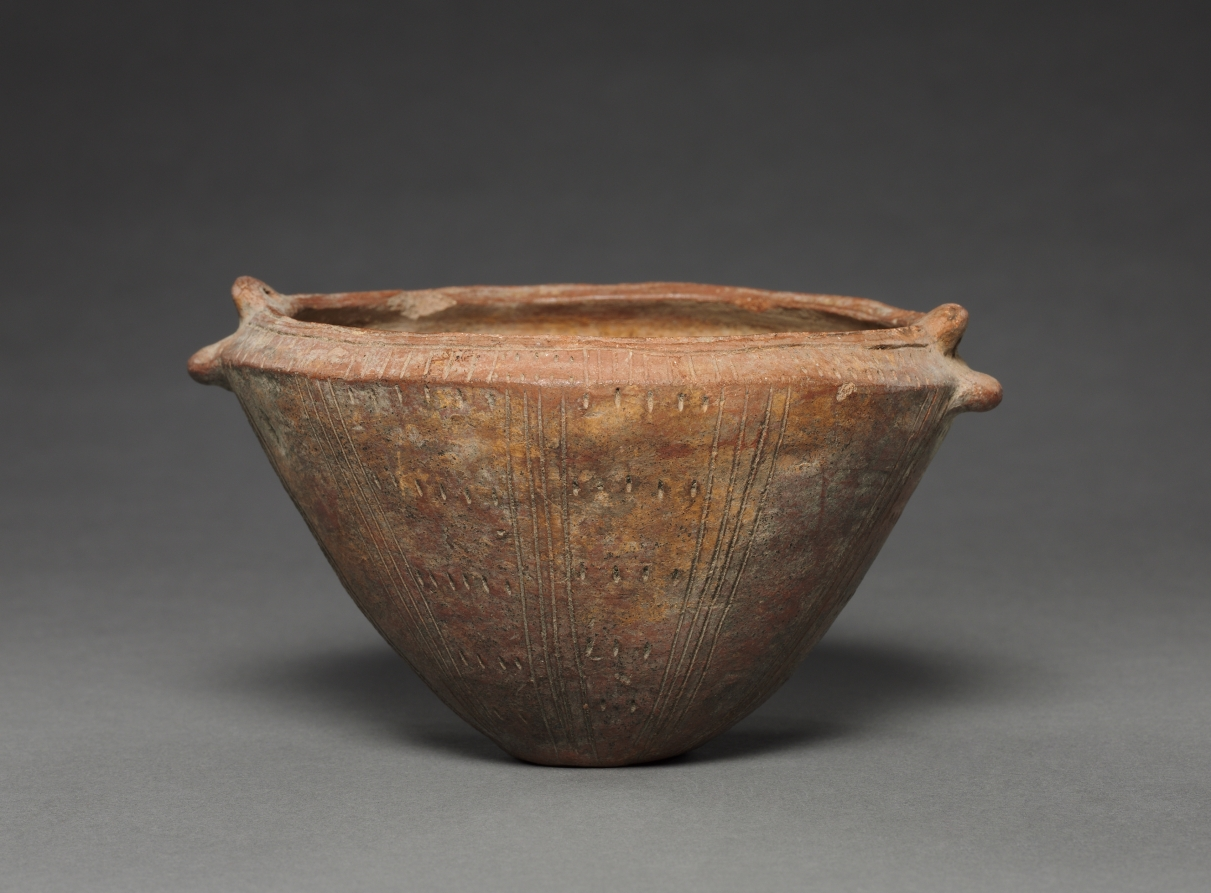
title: Dish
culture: Colombia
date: before 1550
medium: red ware with incised patterns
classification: Ceramic